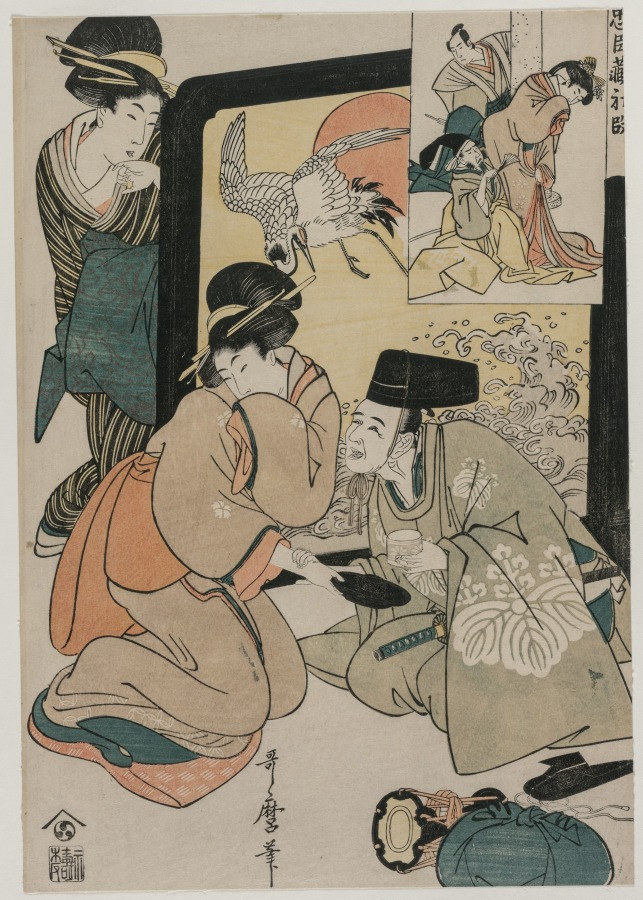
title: Chushingura: Act I of The Storehouse of Loyalty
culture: Japan, Edo period (1615–1868)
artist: Kitagawa Utamaro (Japanese, c. 1754–1806)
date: late 1790s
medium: color woodblock print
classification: Print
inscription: Artist's signature: Utamaro hitsu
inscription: Publisher: Nishimuraya Yohachi (Eiju han, emblem).